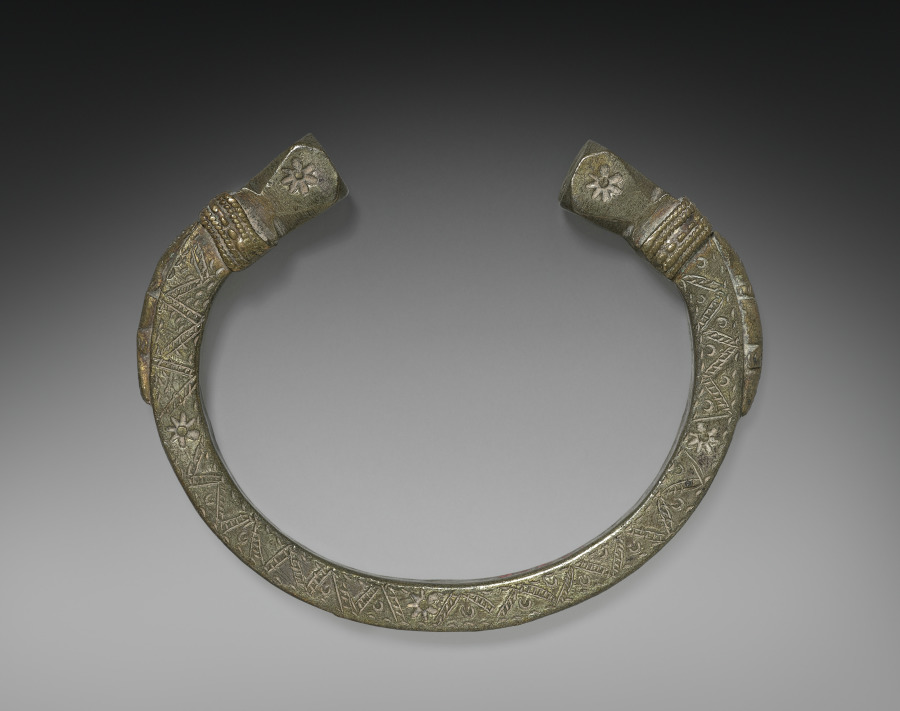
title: Anklet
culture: India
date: 1800s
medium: silver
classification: Jewelry